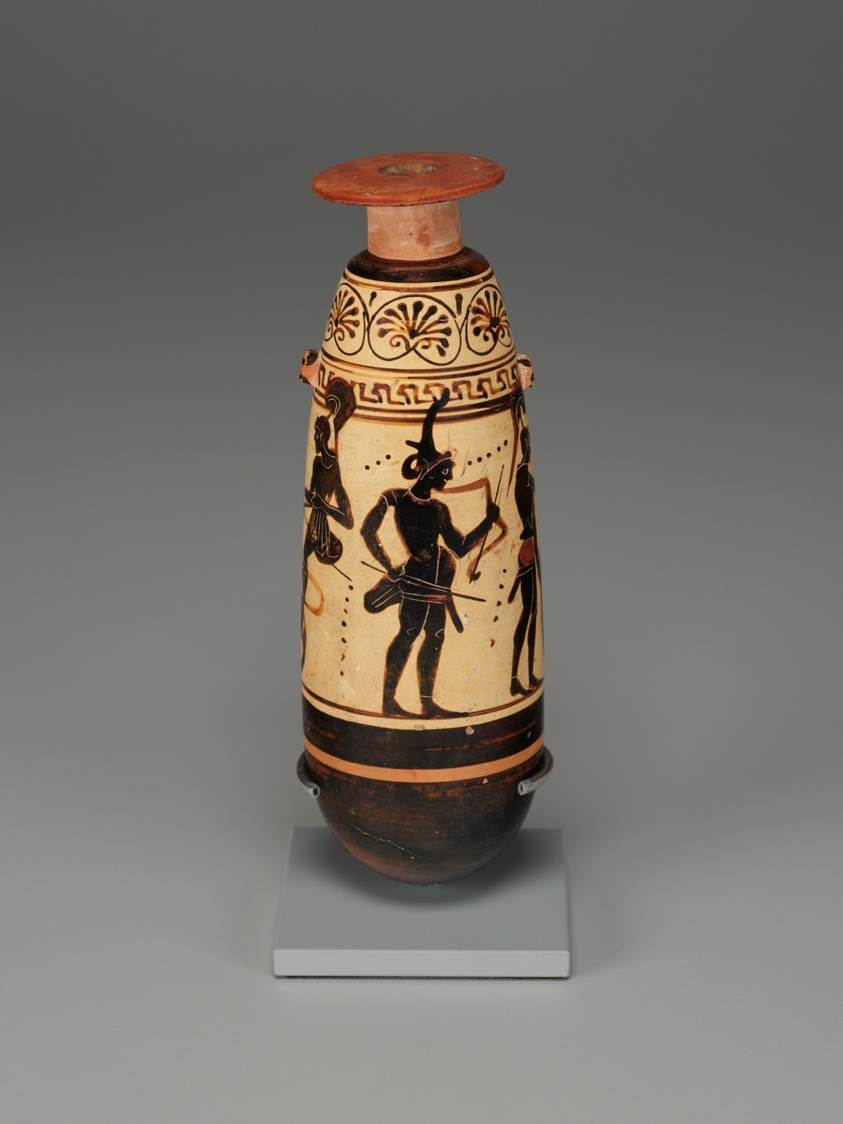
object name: Vessel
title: Alabastron (Container for Scented Oil)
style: archaic (greek), attic, ancient, greek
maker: Attributed to the Diosphos Painter; Greek; Athens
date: about 500-480 BCE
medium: terracotta, black-figure on white ground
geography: Athens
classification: vessel; ancient art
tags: mythology, beauty, rituals